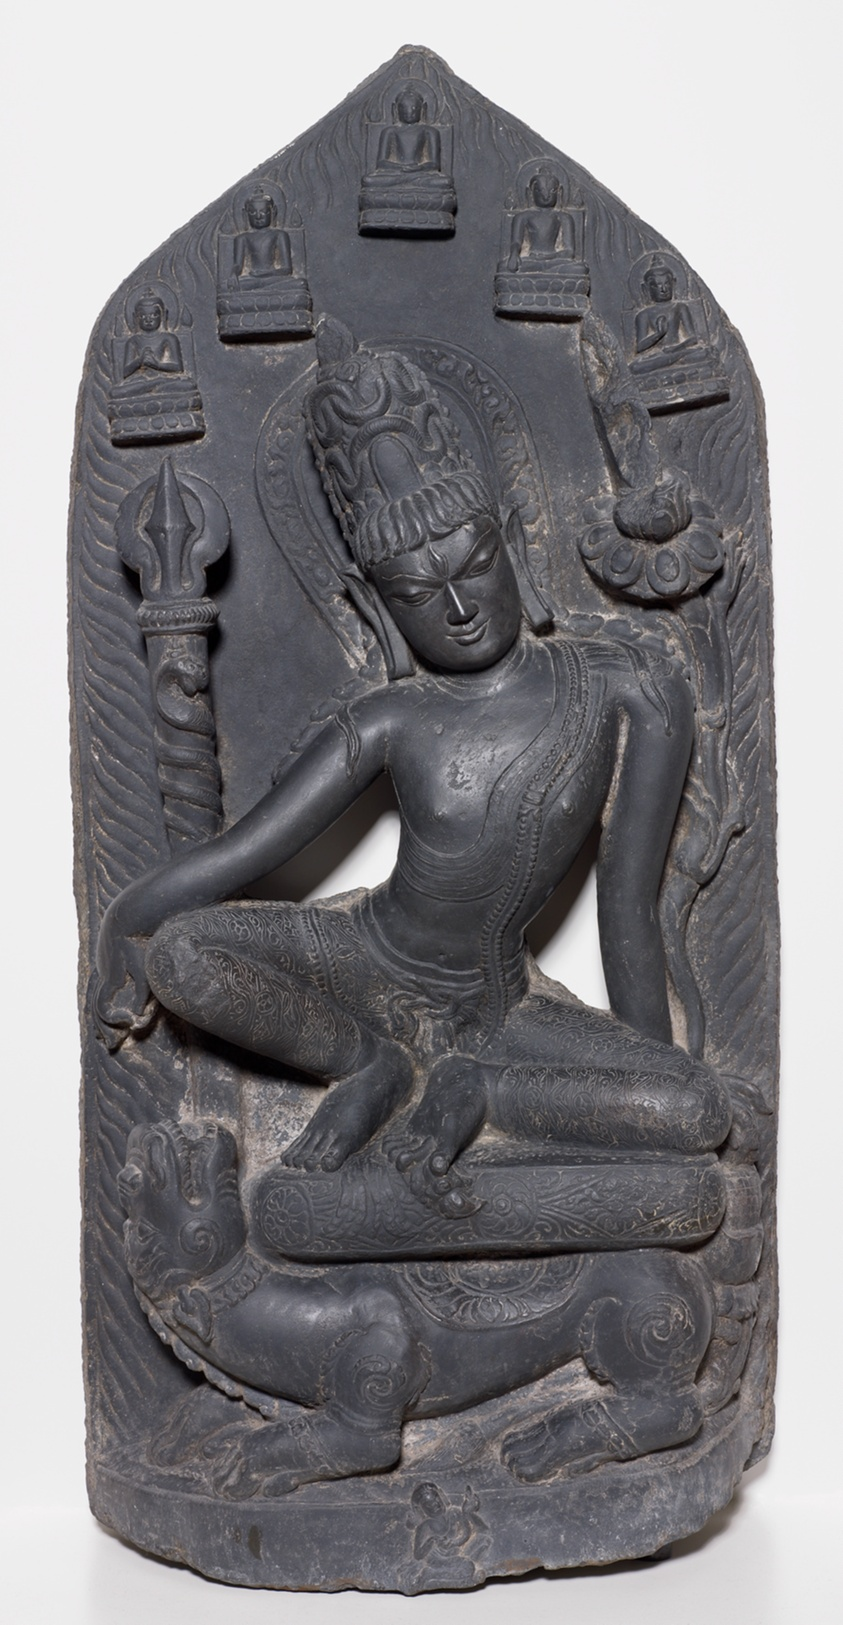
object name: Sculpture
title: Bodhisattva Simhanada Lokeshvara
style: South Asian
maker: India; Bihar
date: Pala period, about 11th century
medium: Basalt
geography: Bihar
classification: stone; sculpture; asian art